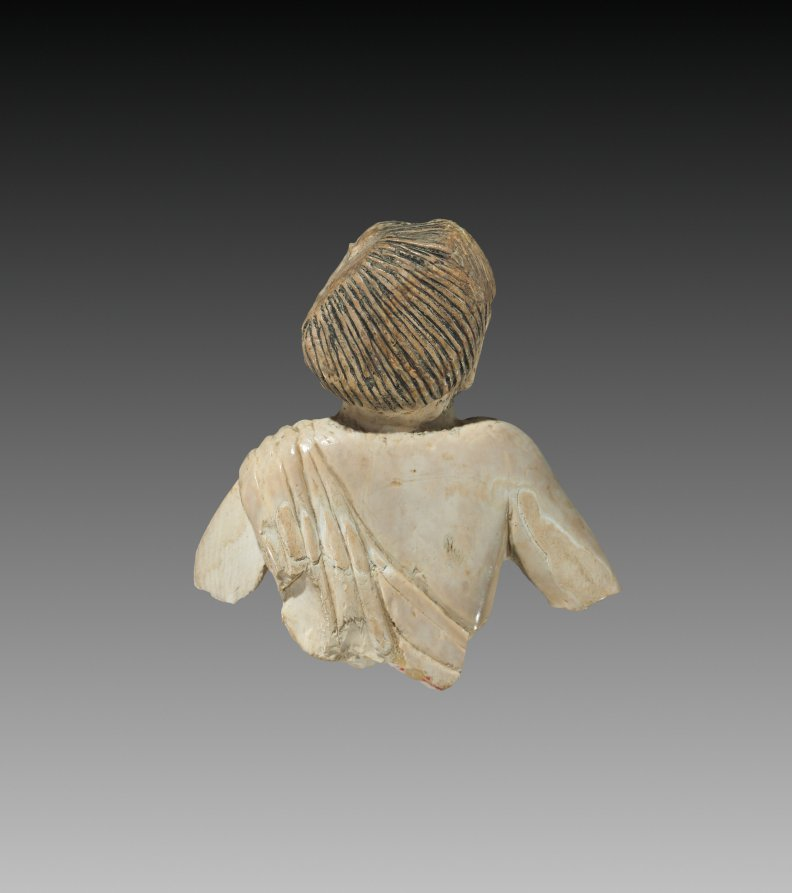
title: Male Bust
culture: Afghanistan, Begram, Kushan period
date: c. 50–320 CE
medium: ivory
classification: Ivory